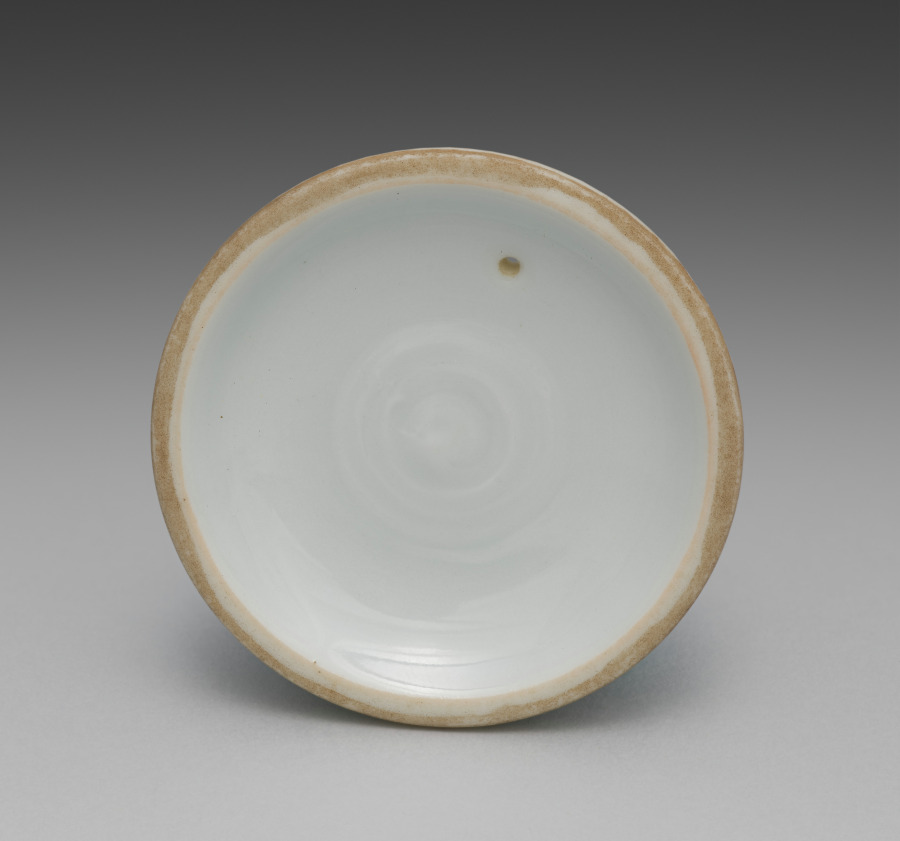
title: Lid for a Teapot from Tea Set with Orchids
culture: Japan, Meiji period (1868–1912)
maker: Seifū Yohei III (Japanese, 1851–1914)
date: c. 1893–1914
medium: Porcelain with underglaze blue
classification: Ceramic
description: Although the teapot here is stored in a separate box from the five cups, these six pieces may once have been part of a tea set that included other tools such as a water cooler. The teacups have orchid flowers on both sides in underglaze blue, as well as a blue band inside the footring. The teapot has the same design and a blue band painted around the bottom of the lid’s knob. The cups’ long wood storage box is stamped on the exterior, over the lid and base, with a small red seal reading “Satō.” The same seal appears on five small squares of yellow textile, one placed in the bottom of each compartment in the teacup storage box. These are additional to the customary yellow cloths stamped with a “Seifu” seal. Interestingly, four of the Seifū cloths are stamped with an ovoid seal, while the remaining cloth, which is a slightly lighter color, has an unusual seal that is not quite gourd-shaped and with the fū of Seifū in a stylized, unrecognizable form. The teapot has its own box with a Satō seal and is wrapped with an orange textile stamped with the same unusual Seifū seal. A set with a very similar surface design is in the Brooklyn Museum. The Brooklyn set has a water cooler and a small pitcher, in addition to the teapot and cups, and all are in a single storage box. This box records the tea tools as made with kanpakuji, or “bright-jewel white porcelain,” counted among Yohei III’s most important inventions, and carved images. In fact, both sets have a white surface much closer in coloration to the cool white of porcelain clay used in Kyoto at the time, and the designs are simply painted. The Brooklyn set was thus likely mismatched at some point with a box intended for another tea set. Nonetheless, the box may have helped prevent the set’s original components from being dispersed, and the set itself provides insight into how the other tools from the present set may have looked.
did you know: This tea set with orchids has a side-handled pot called a kyūsu, used for steeping, straining, and serving tea.